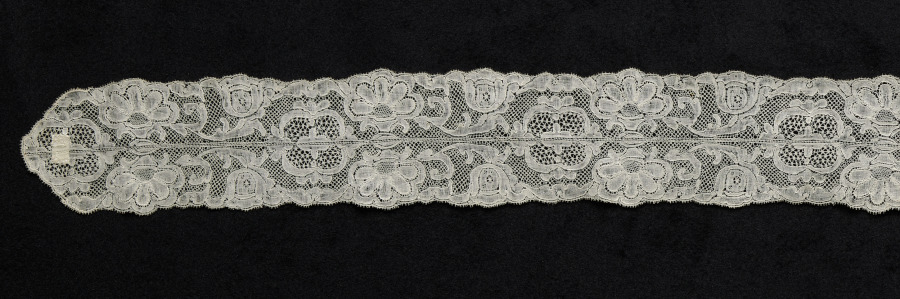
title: Lace Lappets and Edging for Cap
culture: Belgium, Mechelen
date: 1700s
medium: Linen: bobbin lace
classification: Lace